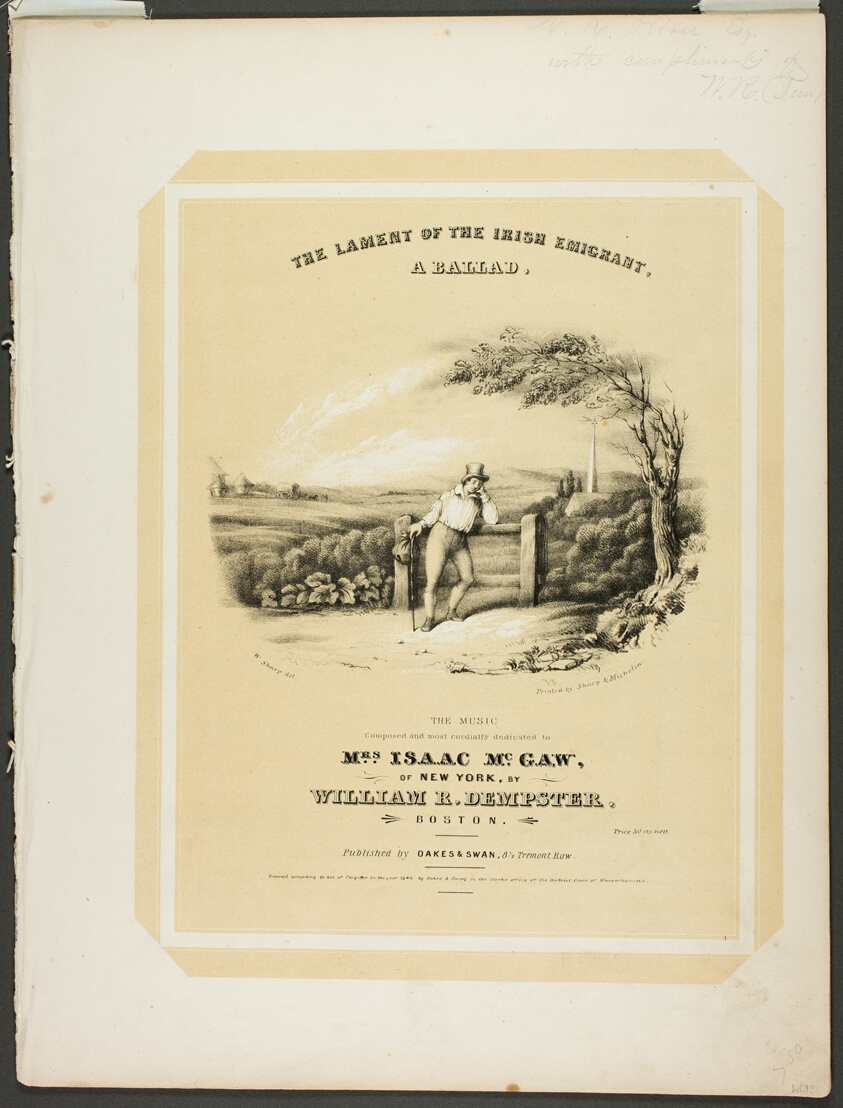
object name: Print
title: The Lament of the Irish Immigrant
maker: William Comely Sharp (American, 1822–1897); printed by Sharp and Michelin (Boston)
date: 1840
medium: Lithotint on paper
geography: United States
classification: lithograph; print; prints and drawing